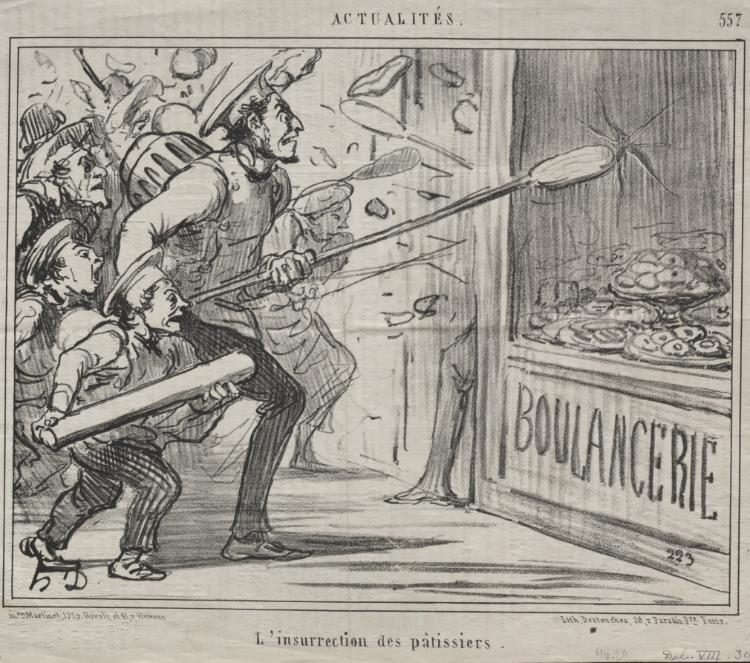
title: The revolt of the pastry chefs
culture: France, 19th century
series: News of the Day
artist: Honoré Daumier (French, 1808–1879)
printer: Destouches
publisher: Mon. Martinet, r. Rivoli, et 41 r. Vivienne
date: 1858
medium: lithograph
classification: Print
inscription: Lower margin, printed: Mon Martinet, 172 r. Rivoli et 41 r. Vivienne / Lith. Destouches, 28 r. Paradis Pre. Paris. ; pencil: good imp / 46.211 / Del Viii. 3077, state II/II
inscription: Above image, printed: ACTUALITÉS. / 557 ; Below image, printed: L'insurrection des pâtissiers.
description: This print was published in Le Charivari (September 23, 1858) as plate 557 from the series News of the Day.